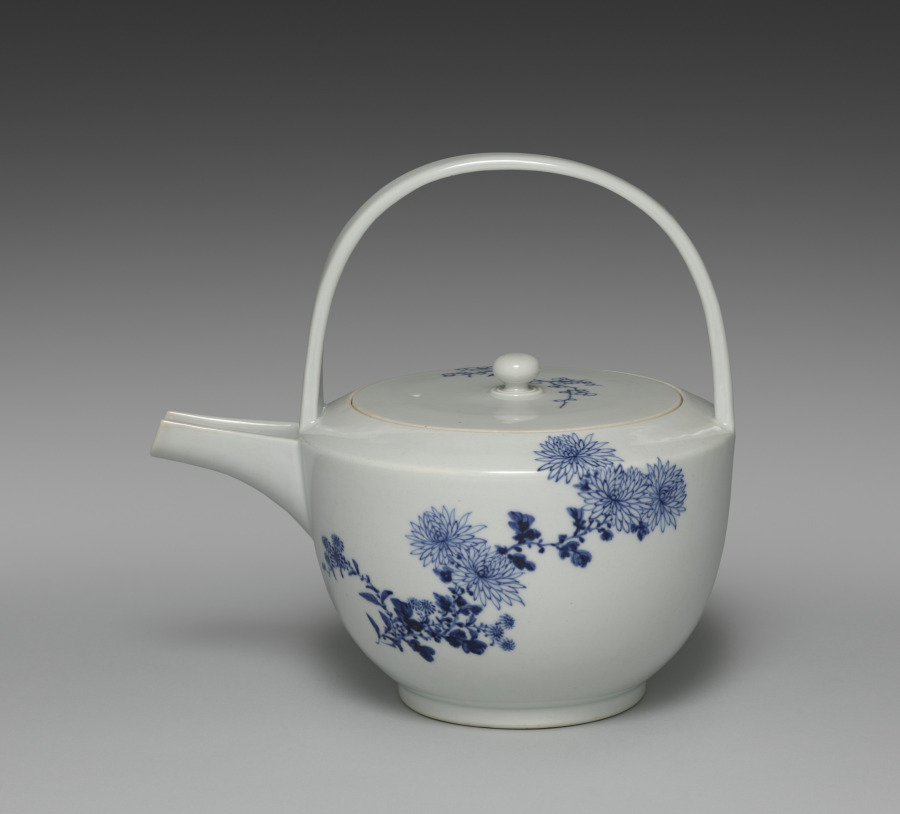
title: Sake Pourer with Chrysanthemum, Orchid, and Plum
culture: Japan, Meiji period (1868–1912)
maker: Seifū Yohei III (Japanese, 1851–1914)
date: c. 1887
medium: Porcelain with underglaze blue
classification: Ceramic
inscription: Artist's signature in underglaze blue on the base.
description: Seifū Yohei II and his successor, Seifū Yohei III, trained in ink painting. Their brush skills are seen in their underglaze cobalt blue designs. Orchid, bamboo, chrysanthemum, and plum, appearing on Yohei III’s sake pourer, are known as the Four Gentlemen. They symbolize the virtues of humility, integrity, endurance, and perseverance.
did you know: This sake pourer is decorated with the Chinese theme of the Four Nobles, in which the qualities of a good person are represented by plant.